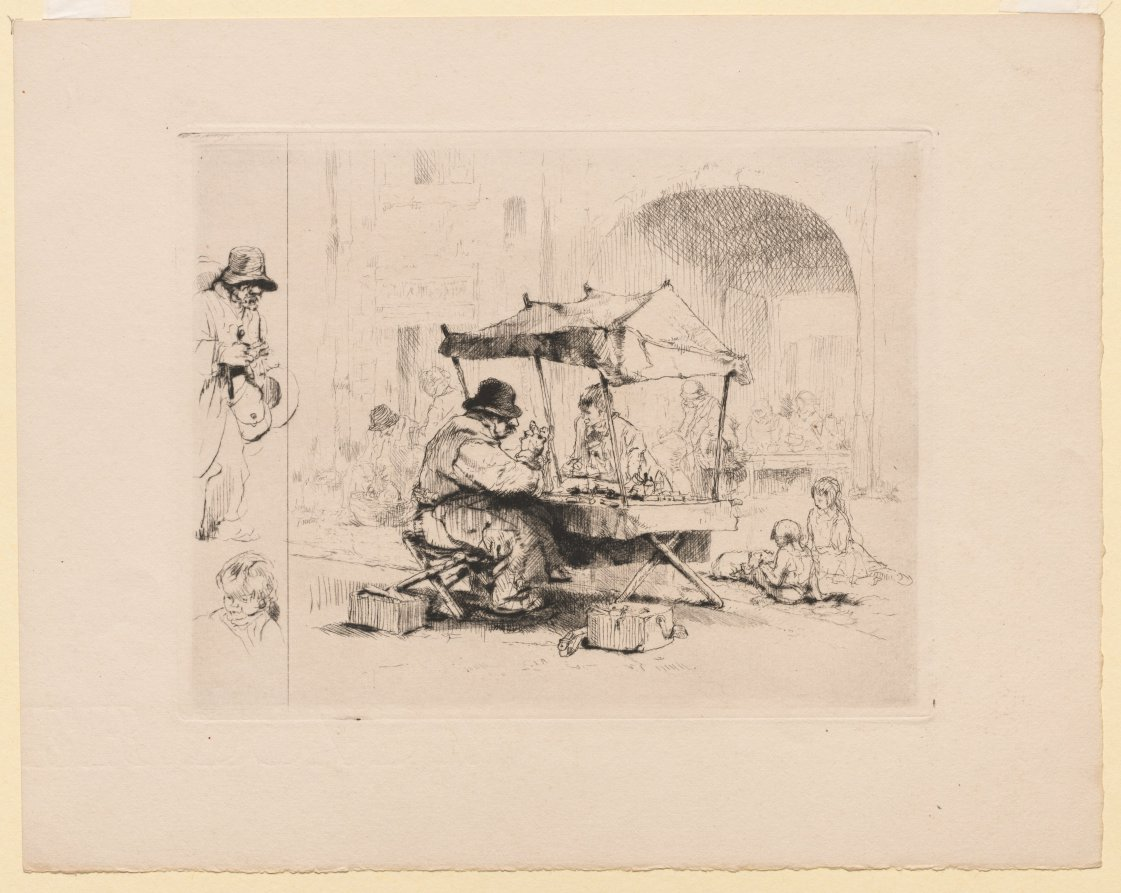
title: [Merchant in his stall with children playing]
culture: France, 20th century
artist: Auguste Brouet (French, 1872–1941)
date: c. 1902–41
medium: etching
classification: Print